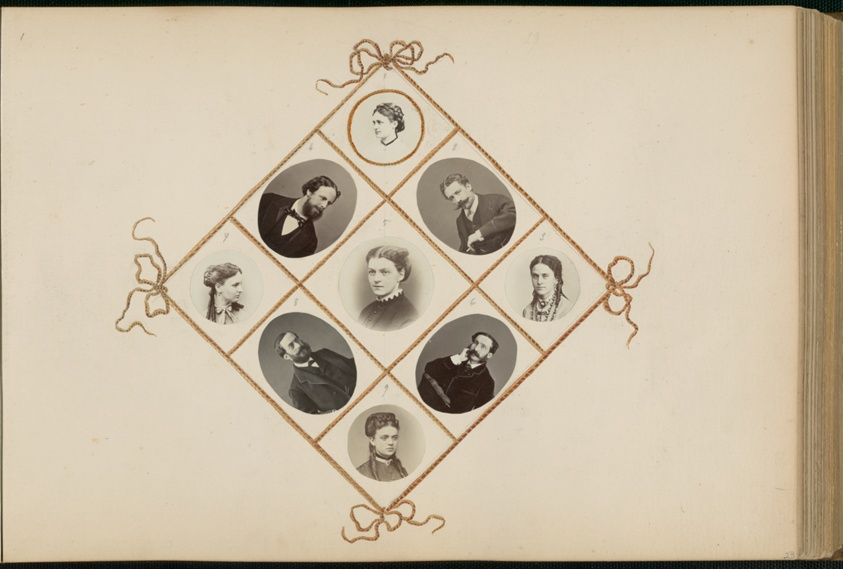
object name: Photograph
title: The Madame B Album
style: 19th century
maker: Marie-Blanche Hennelle Fournier (French, 1831–1906)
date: 1870s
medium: Albumen prints with watercolor (in album)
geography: France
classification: photograph; albumen silver print; photography